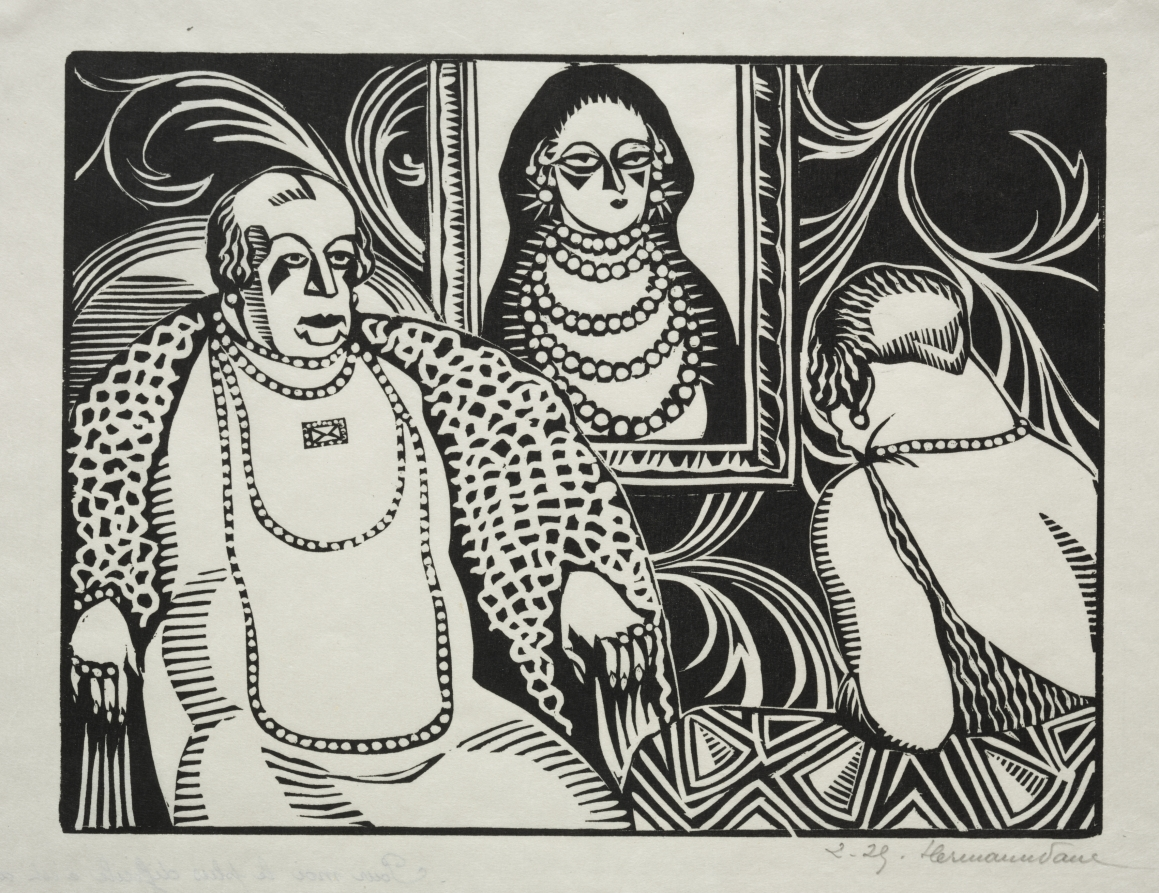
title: Pour moi le plus diffile c'est de m'habituer à porter un chapeau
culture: France, 20th century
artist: Hermann Paul (French, 1864–1940)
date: c. 1920s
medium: woodcut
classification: Print